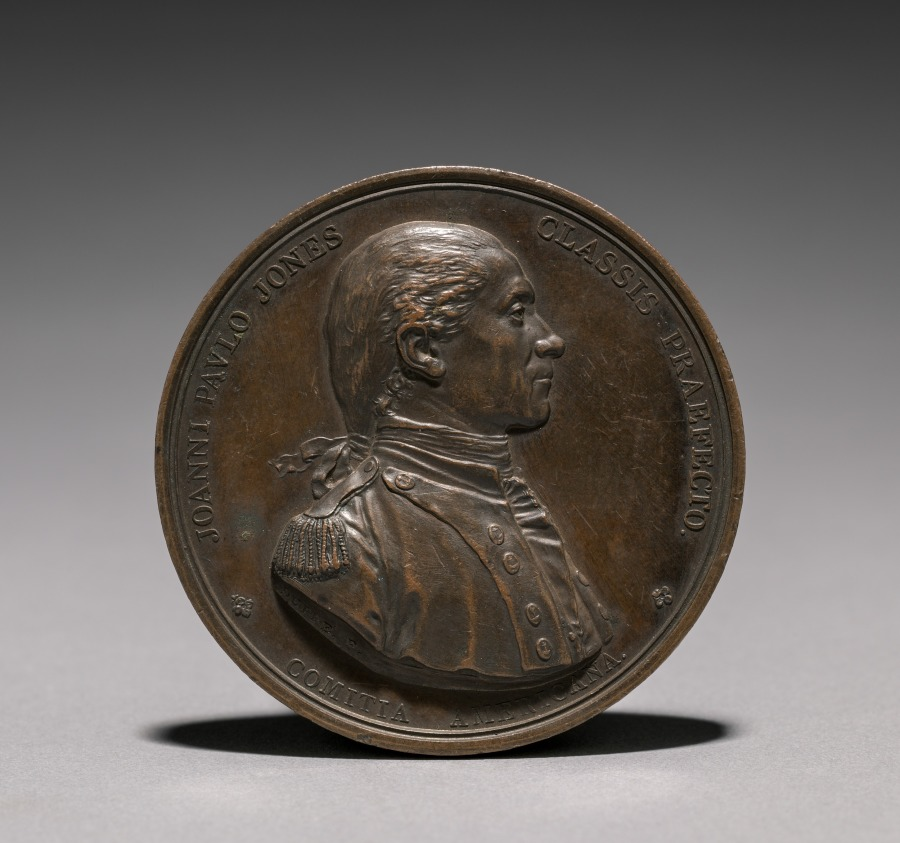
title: Medal: John Paul Jones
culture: France, 19th century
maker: Augustin Dupré (French, 1748–1833)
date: 1779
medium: bronze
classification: Metalwork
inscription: Joanni Pavlo Jones classis Praefecto. Comita Americana.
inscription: HOSTIVM NAVIBVS CAPTIS AVT FT GATIS.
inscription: AD ORAM SCOTIAE XXIII. SEPT. M. DCCLXXVIIII. DUPRE F.